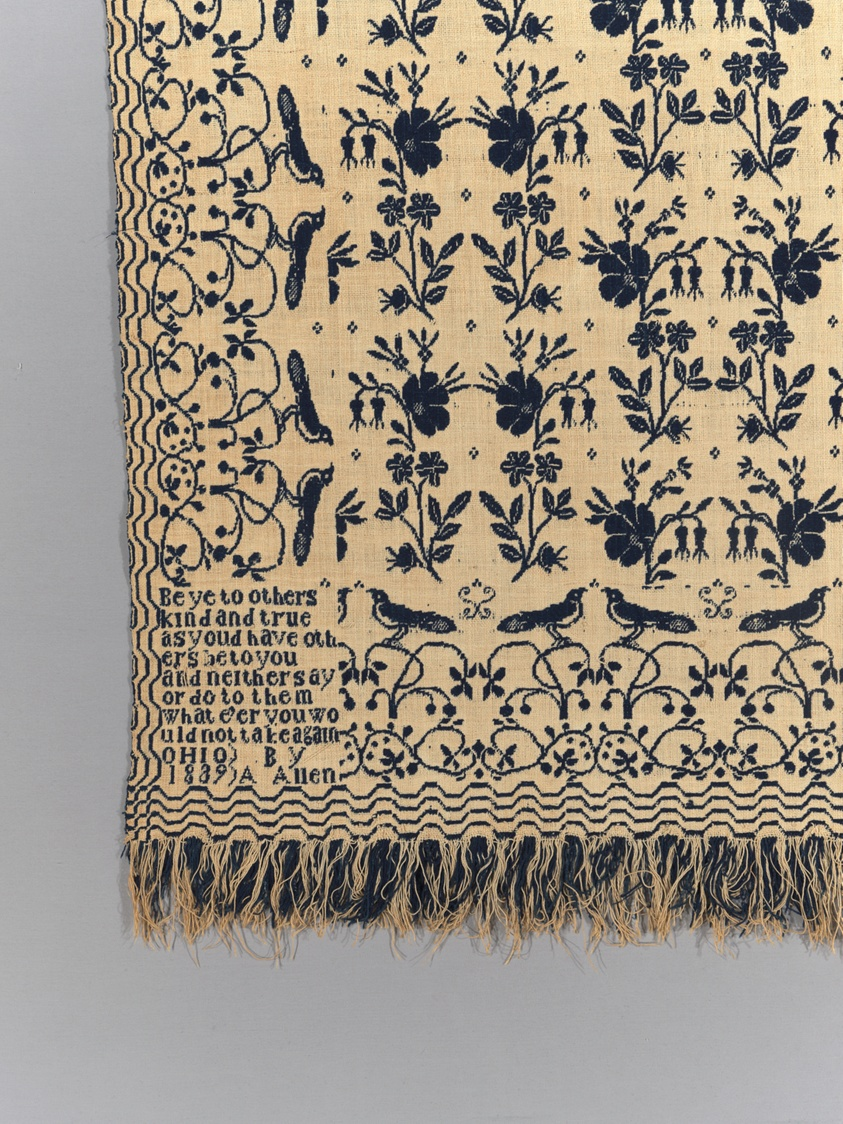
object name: Textile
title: Coverlet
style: 19th century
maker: Abram Allen (American, born Irish, c. 1796- after 1860); United States, Ohio, Clinton County, Wilmington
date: 1839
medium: Cotton and wool, plain weave double cloth with main warp fringe; woven on loom with Jacquard attachment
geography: Ohio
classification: textile; coverlet; weaving - coverlet; weaving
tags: flowers, words, vines, primrose, fruit, friendship, foliage, birds, bird, coverlet